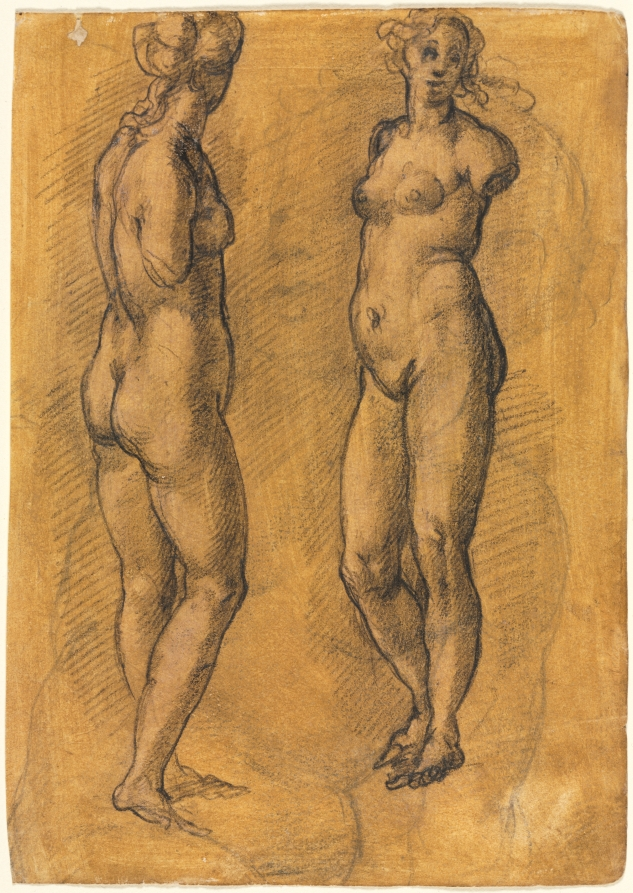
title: Copy of an Antique Statue of a Standing Woman (two views), over a Sketch of a Putto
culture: Italy, 16th century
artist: Jacopo Chimenti (Italian, c. 1554–1640)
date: 1570s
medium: black chalk heightened with traces of white paint and white chalk(?)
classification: Drawing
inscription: VERSO, upper center, in graphite: ROSSO / Soc G 623 / FAA